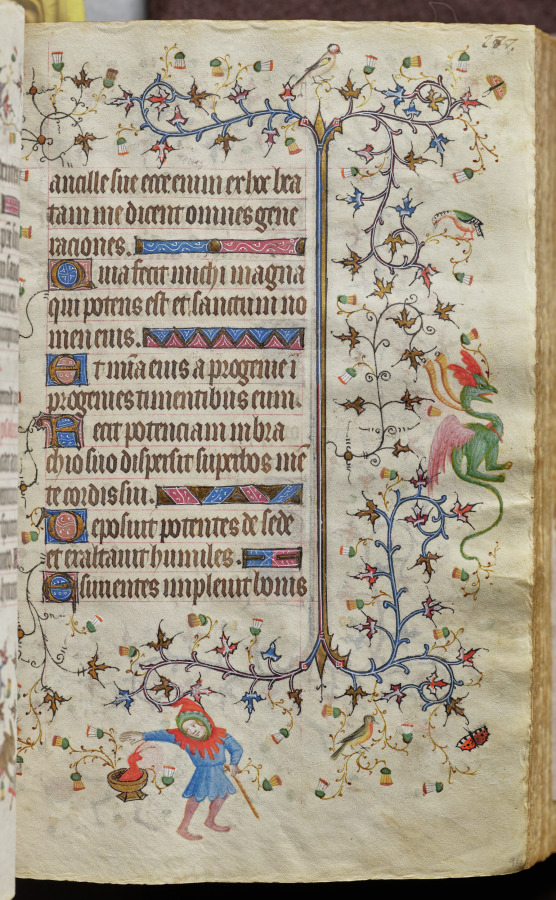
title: Hours of Charles the Noble, King of Navarre (1361-1425): fol. 94r, Text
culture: France, Paris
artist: Master of the Brussels Initials and Associates (French)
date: c. 1405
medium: ink, tempera, and gold on vellum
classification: Bound Volume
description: This precious volume was obviously highly prized by its owner, the French-born King of Navarre, who had his coat of arms painted on no less than twenty folios. Rather than directly commissioning this manuscript from a specific workshop, it seems that Charles the Noble acquired his book of hours -- perhaps ready-made for the luxury market -- while on a trip to Paris in 1404-05. A collaborative effort, six painting styles are evidenced within the pages of this codex, those of two Italians, two Frenchmen, and two Netherlanders. The painter who was responsible for the planning and decoration of the book, and who produced seventeen of the large miniatures, was a Bolognese artist known as the Master of the Brussels Initials. His principal assistant, responsible for most of the borders, was a Florentine who signed his name "Zecho" da Firenze on folio 208 verso.